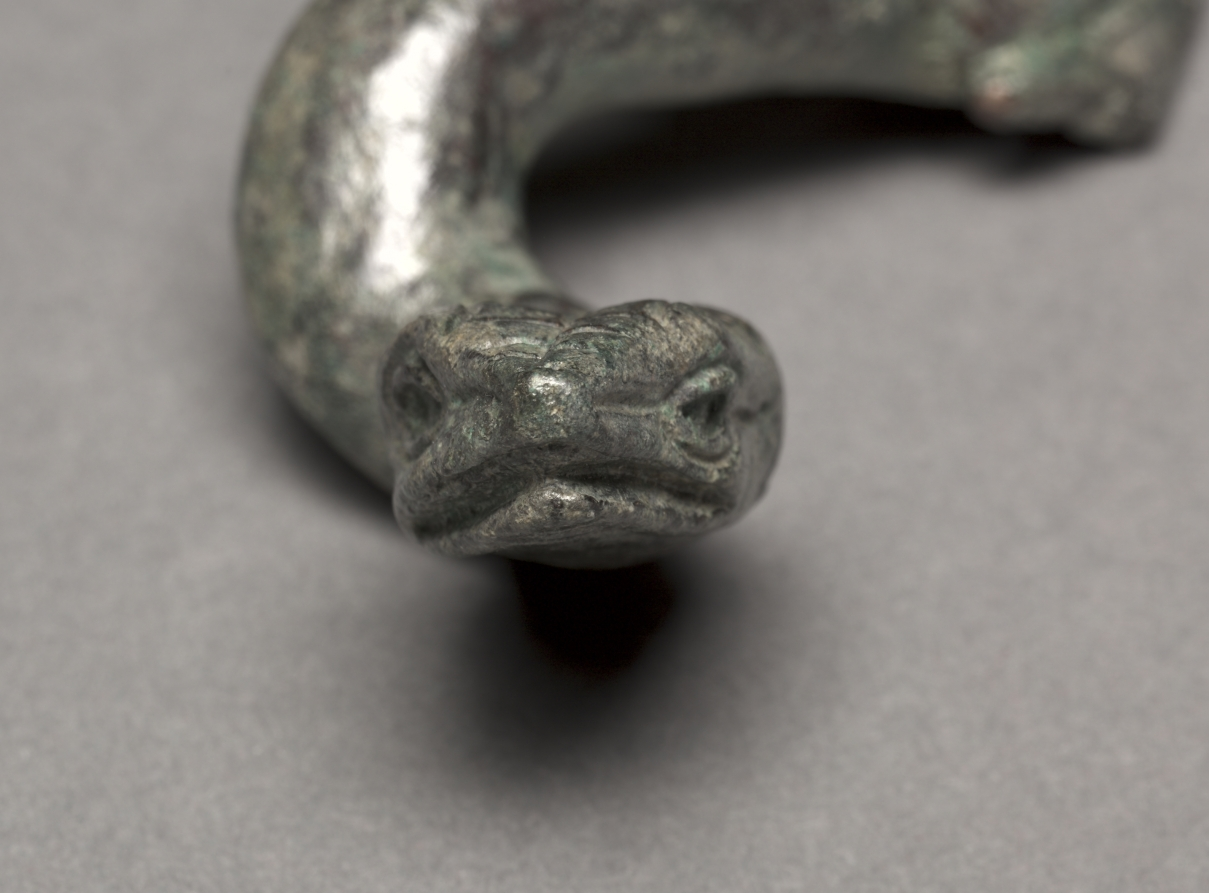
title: Detached Creature from the Cleveland Apollo: Apollo Sauroktonos (Lizard-Slayer) or Apollo the Python-Slayer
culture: Greece, Athens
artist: attributed to Praxiteles (Greek, Athenian, c. 400–330 BCE)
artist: or Follower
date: c. 350–200 BCE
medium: bronze, copper and stone inlay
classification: Sculpture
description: Both snakelike and lizardlike in appearance, the creature has a scaly head and four small feet. These are attached asymmetrically to its long and sinuous body, some with carefully delineated toes, others less detailed. The smallest foot falls behind a line bisecting the creature, where radiography shows a pin joining two separately cast sections. Although the bronze of the front and back halves is quite similar, the front half shows greater porosity (air bubbles). Perhaps the original back half was damaged during casting, necessitating a new or re-casting of that portion of the creature, with a smaller, relocated fourth leg.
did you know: Despite its small size, the creature was cast in two solid parts.